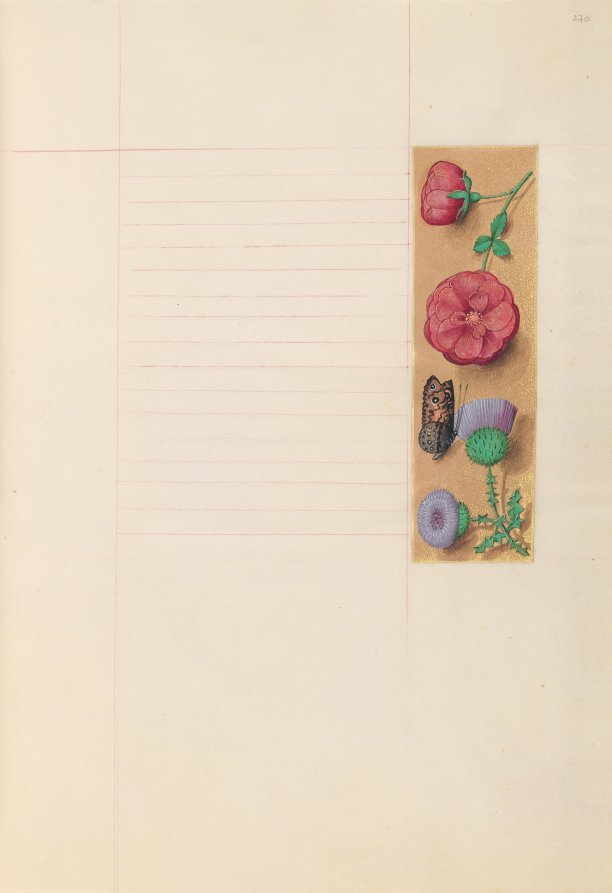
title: Hours of Queen Isabella the Catholic, Queen of Spain: Fol. 270r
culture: Flanders, Ghent and Bruges, late 15th century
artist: Master of the First Prayerbook of Maximillian (Flemish, c. 1444–1519)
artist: and Associates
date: c. 1500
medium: ink, tempera, and gold on vellum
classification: Bound Volume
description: This manuscript was illuminated by a circle of at least five highly organized manuscript painters active in the Flemish cities of Ghent and Bruges. The principal illuminator was Alexander Bening, who painted the majority of the book's miniatures. Manuscripts produced by this circle of artists are renowned for the decoration of their borders, which typically feature a rich variety of realistically-painted flowers, birds, and butterflies. This prayer book, called a book of hours, was intended not for a cleric, but for the private devotions of a lay person-in this case, Isabella the Catholic, Queen of Spain (1451-1504). Isabella's coat of arms embellishes the book's frontispiece. It is unlikely that the book was commissioned by the Queen herself; rather, she probably received it as a diplomatic gift from someone courting her patronage, perhaps Cardinal Francisco Jimenez de Cisneros. A Franciscan friar, Jimenez was dependent upon Isabella for his advancement, first to the post of Queen's confessor in 1492, and then to Archbishop of Toledo in 1495.